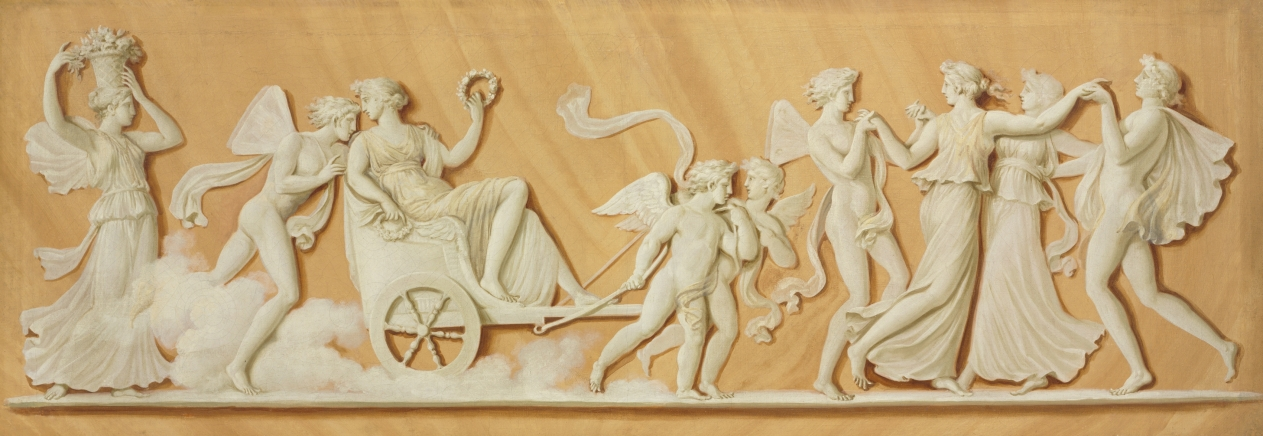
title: Overdoor Painting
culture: France, 18th century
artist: Pierre Rousseau (French, 1751–1829)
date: 1790s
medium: oil on canvas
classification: Painting